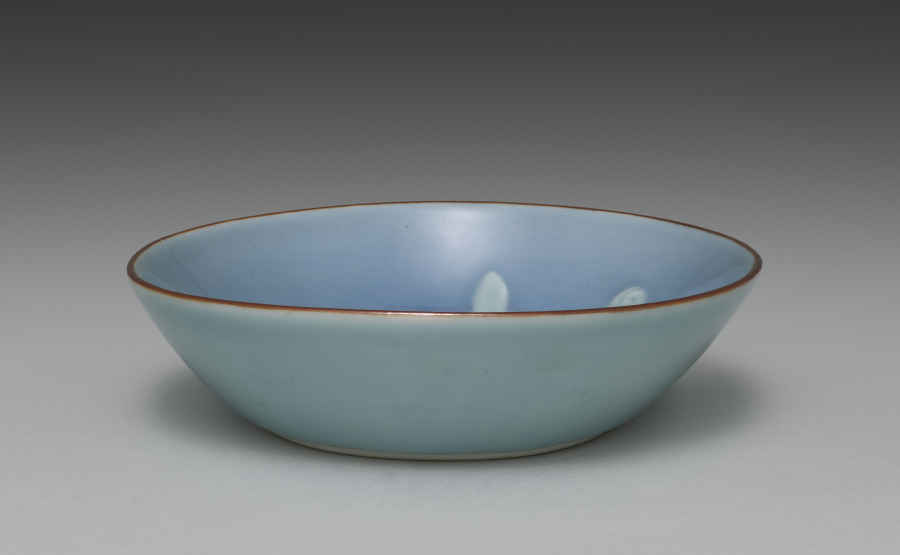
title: Dish from Dishes with Shells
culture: Japan, Taishō period (1912–26)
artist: Seifū Yohei IV (Japanese, 1872–1951)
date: 1914–46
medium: One from a set of five dishes; porcelain with blue glaze, iron oxide, and molded design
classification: Ceramic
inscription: 清風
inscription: 清風造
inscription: 清風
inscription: 成山清風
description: Yohei IV chose an aquatic theme for this set of five mukōzuke, side dishes. He added an iron oxide rim and used a concentrated blue glaze on both the interior and exterior. The glaze, named on the box lid, is his father’s “evening moon” (tsukiyoi) color. The conch in relief takes up the entire bottom of the dish. Up the sides are two snails on one end and on the other a scallop. This results in a boldly graphic, less realistic effect.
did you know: This set of dishes, mukōzuke, could be used for serving small side dishes at a tea gathering.